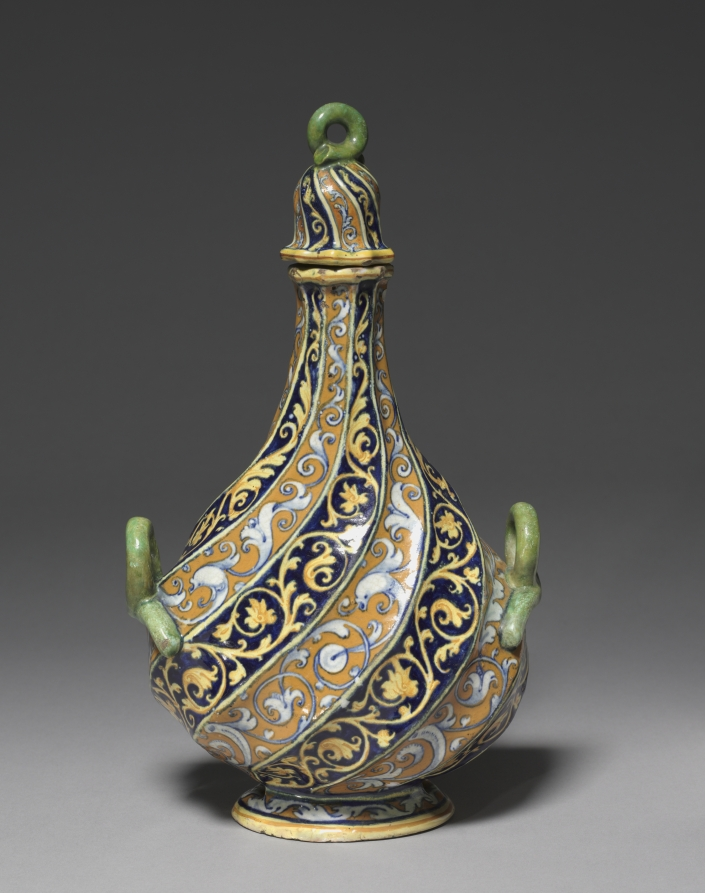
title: Pilgrim Bottle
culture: Italy, Papal States, Faenza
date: c. 1540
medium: tin-glazed earthenware (maiolica)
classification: Ceramic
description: During the Italian Renaissance of the 1400s and 1500s, nobles and merchants eager to express their wealth and sophistication ordered ceramics for dining, display, and storage. Known as maiolica, because it resembled the brightly colored ceramics from the Mediterranean island of Majorca, these ceramic vessels were covered with a tin glaze that provided an opaque white surface on which colorful decoration could be painted.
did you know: This pear-shaped vessel recalls flasks that early travelers tied to the harnesses of their horses on long trips or pilgrimages to holy sites.